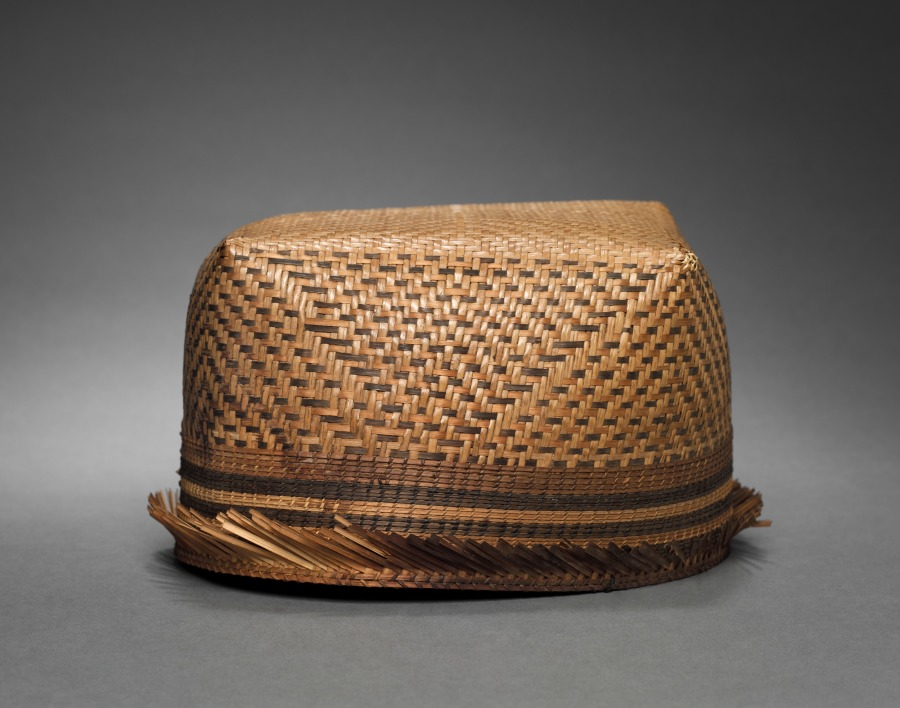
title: Hat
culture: Africa, Central Africa, Democratic Republic of the Congo, Mangbetu, 20th century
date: before 1929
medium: Plant fibers and dye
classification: Garment